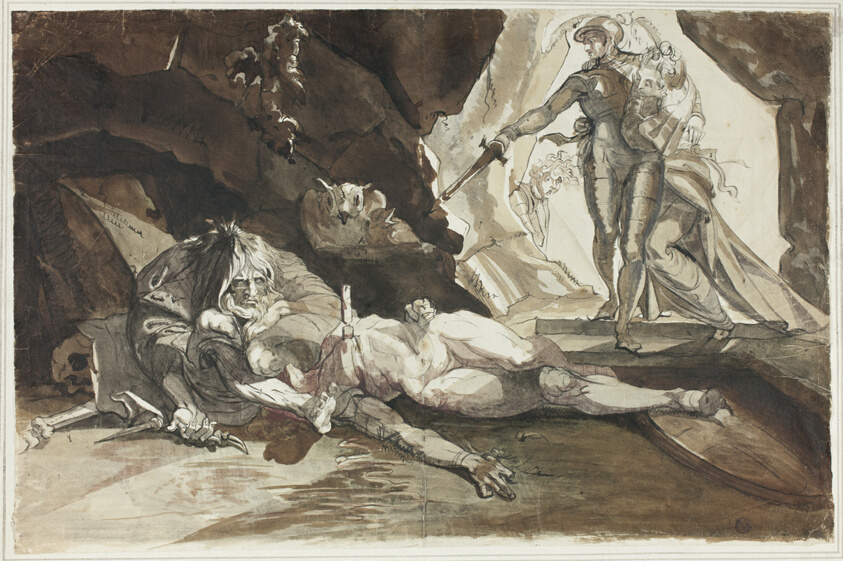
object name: Drawing and Watercolor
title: The Cave of Despair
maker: Henry Fuseli (Swiss, active in England, 1741-1825)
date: c. 1769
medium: Pen and black ink, with brush and brown and gray wash and touches of red gouache, over graphite and touches of charcoal, on ivory laid paper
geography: England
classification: pen and ink drawings; drawings (visual works); prints and drawing; paper